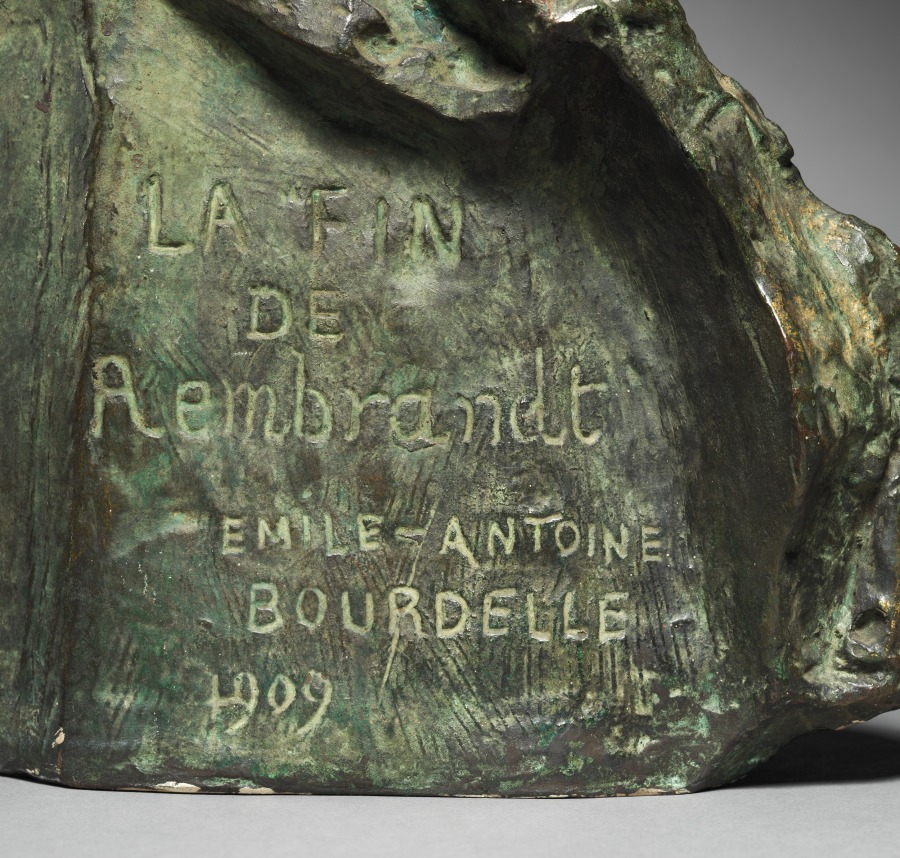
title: The End of Rembrandt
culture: France, 20th century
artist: Emile Antoine Bourdelle (French, 1861–1929)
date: 1909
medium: bronze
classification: Sculpture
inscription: Dated: "1909"